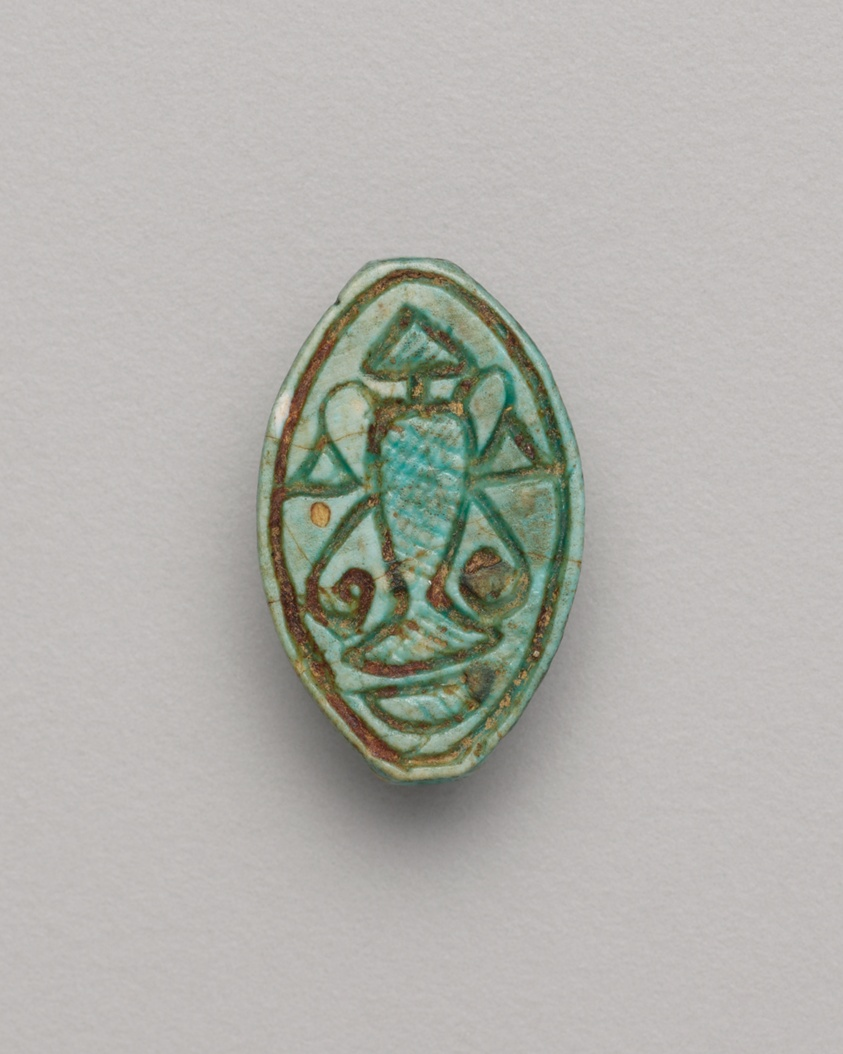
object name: Costume and Accessories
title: Cowroid Amulet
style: new kingdom, ancient, eighteenth dynasty, egyptian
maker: Egyptian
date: New Kingdom, Dynasty 18 (about 1550–1069 BCE)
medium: Glazed steatite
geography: Egypt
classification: amulet; jewelry; ancient art; costume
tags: shells, vessels, floral motifs, Hieroglyphs